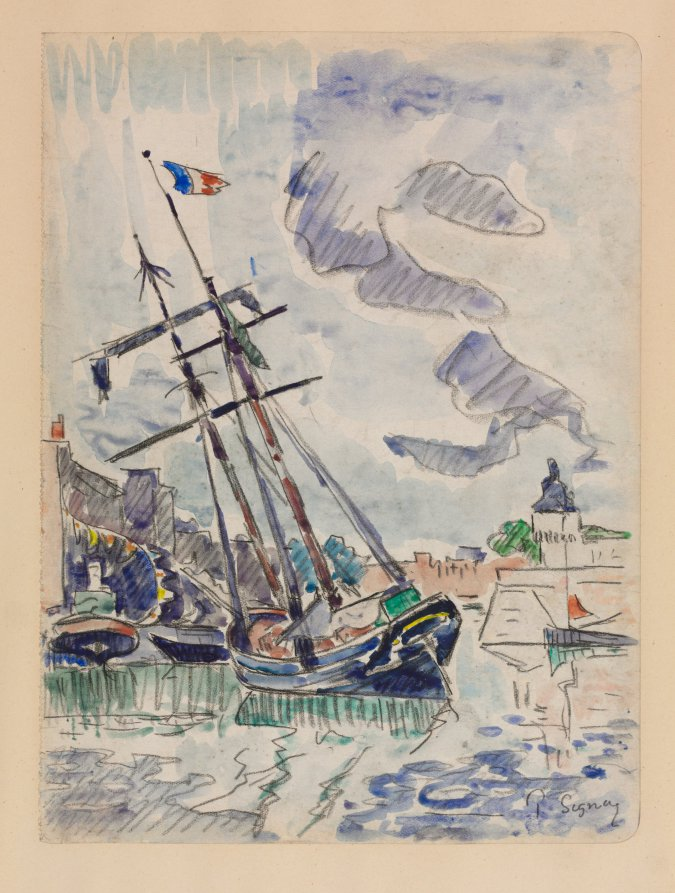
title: Boat in Port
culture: France, 20th century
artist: Paul Signac (French, 1863–1935)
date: c. 1929–1931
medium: watercolor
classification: Drawing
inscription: Inscribed, lower right, in black ink (?): Signac